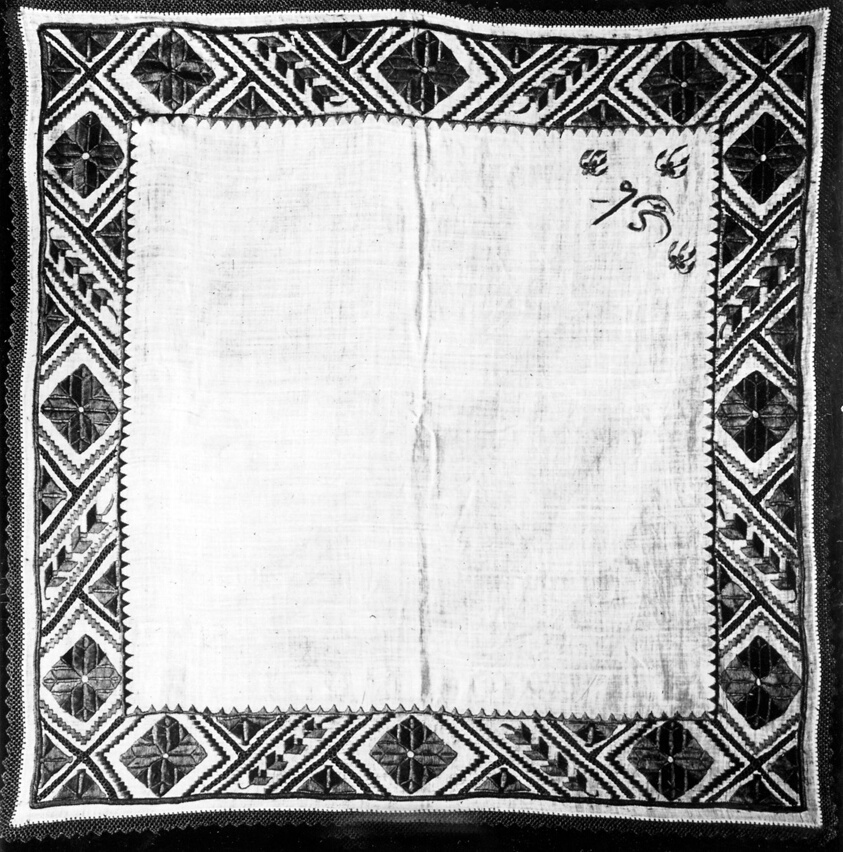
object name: Textile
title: Handkerchief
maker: India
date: 19th century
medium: Linen, plain weave; embroidered with silk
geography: India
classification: textile; needlework (visual works)